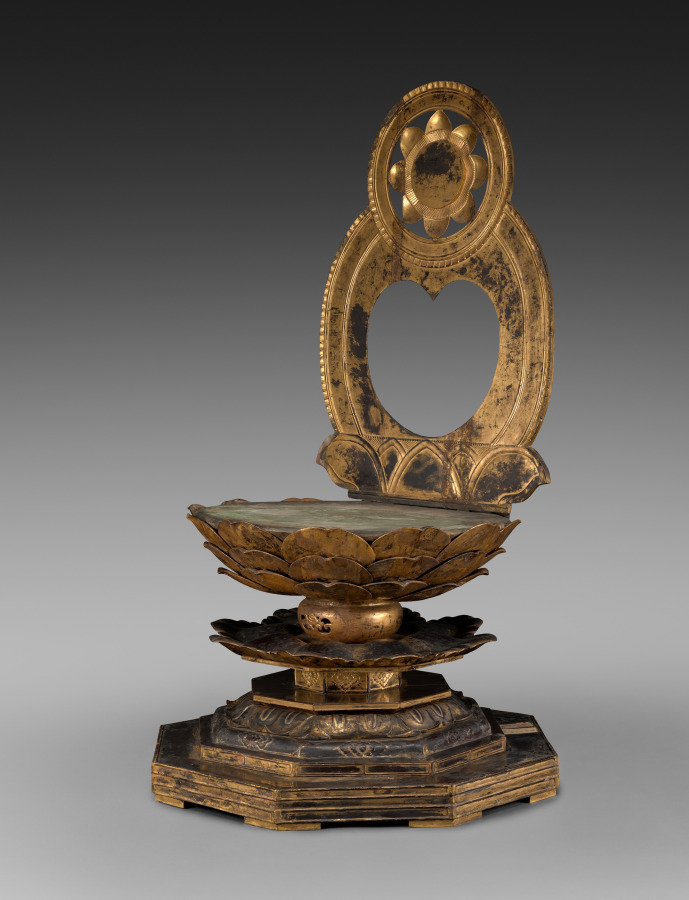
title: Seated Buddha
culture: Japan, Heian period (794–1185)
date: 1100s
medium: gilded wood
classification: Sculpture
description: Composed of a number of hollowed-out pieces of wood that were then covered with lacquer and gilding, this sculpture served as an image of worship in one of the small temples surrounding Kōfukuji, a major Buddhist temple in Nara, Japan. Like many Buddhas, this figure has its right hand positioned in a gesture meaning "fear not." The left hand is a replacement, so its original gesture, a clue to this Buddha's identity, is unknown. However, as the left foot is exposed over the garment, in lotus position, it may have been created as a Medicine Master Buddha, Yakushi Nyorai in Japanese, or the Buddha of our era, Shakyamuni.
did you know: A 1906 photo taken at Kōfukuji shows this sculpture without a halo or left hand.